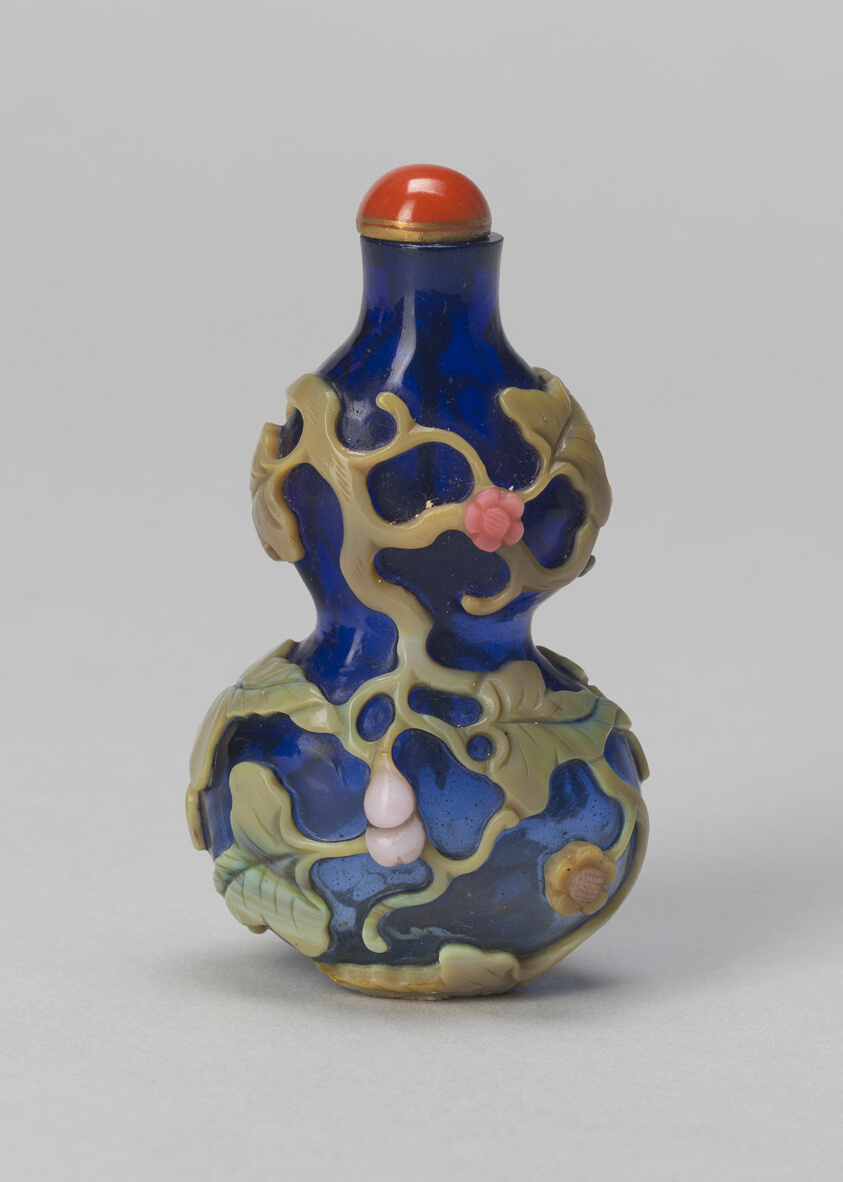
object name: Vessel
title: Gourd-Shaped Snuff Bottle with Trailing Vines and Flower Heads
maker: China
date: Qing dynasty (1644–1911), 1740–1800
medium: Glass; Multi-colored overlay on transparent blue ground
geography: China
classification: snuff bottle; asian art; vessel